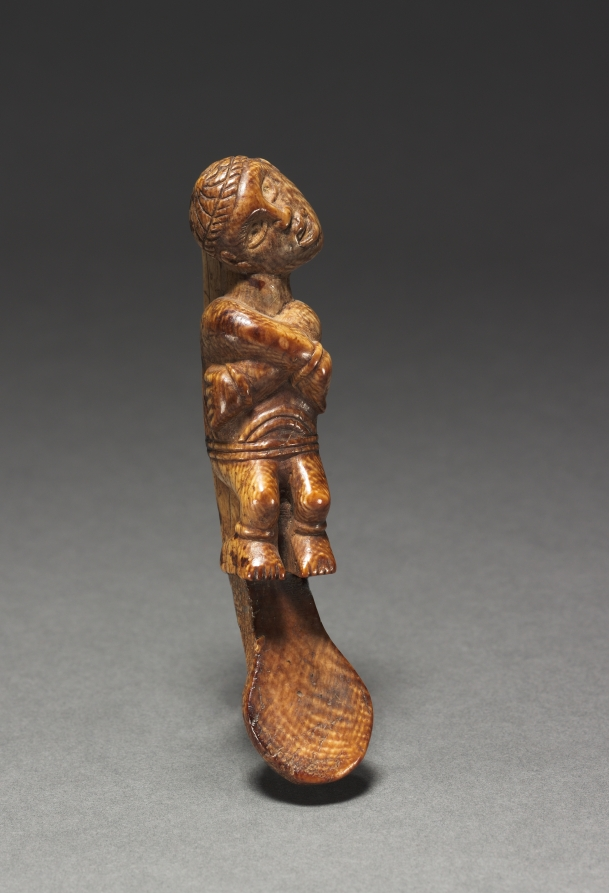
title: Female Figurine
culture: Africa, Central Africa, Democratic Republic of Congo (most likely), Cabinda, or Republic of the Congo, probably Yombe-style maker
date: late 1800s–early 1900s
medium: Ivory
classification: Sculpture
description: This female figurine may be a fragment of a spoon or spatula, but is not confirmed. Iconography of the human image is common in the art of Kongo-speaking peoples, however, this object’s function or purpose is unknown. The position of the arms has been interpreted as that of a bound prisoner while the positioning of the head represents a broken neck or severed head, thus identifying as a sacrificial victim.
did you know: This object is believed to be a portion of a spoon or a spatula. The position of the prisoner is believed to be a sacrificial victim.